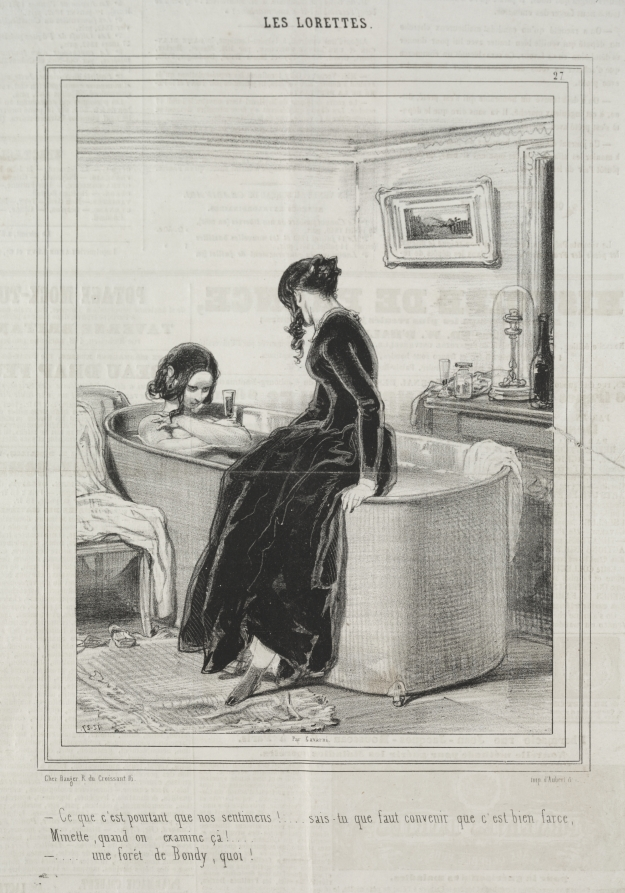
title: Les Lorettes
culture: France, 19th century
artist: Paul Gavarni (French, 1804–1866)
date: 1842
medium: lithograph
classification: Print